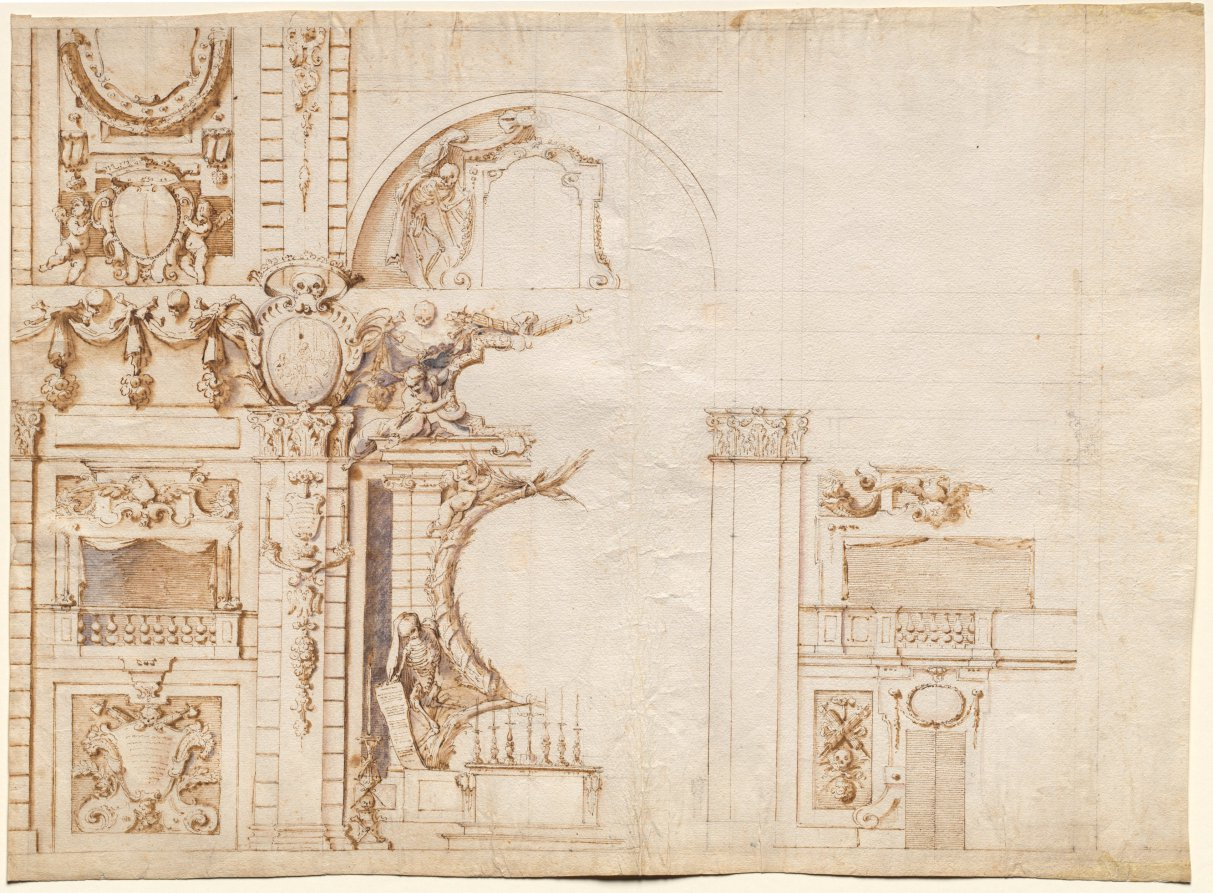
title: Study for the 'Essequie' Conducted in San Lorenzo, Florence, in 1637 in Honour of Holy Roman Emperor Ferdinand II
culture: Italy, Florence, 17th century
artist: Alfonso Parigi (Italian, 1606–1656)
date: 1637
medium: pen and brown ink and brown wash with graphite and accents of pink, purple-grey and deep blue-black wash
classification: Drawing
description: Alfonso Parigi was the official court architect for the Medici, taking over after the death of his father, the great engineer, architect, and designer Giulio Parigi. Testifying to the Medici's interest in cultivating a culture of the macabre, this sheet is an elaborate study for the essequie (funerary rites) for the Holy Roman Emperor Ferdinand II. Skulls and skeletons commingle with angels and garlands, and black draperies would have been hung to transform the church into a strange, macabre world. The Medici also commissioned artists and designers to create apparati, theatrical stage settings that were similarly elaborate, hell-like scenes. Designed only three years before the young Rosa would come to the court, this haunting sheet displays the grotesque artistic fantasia that was in vogue in Florence when Salvatore Rosa arrived.